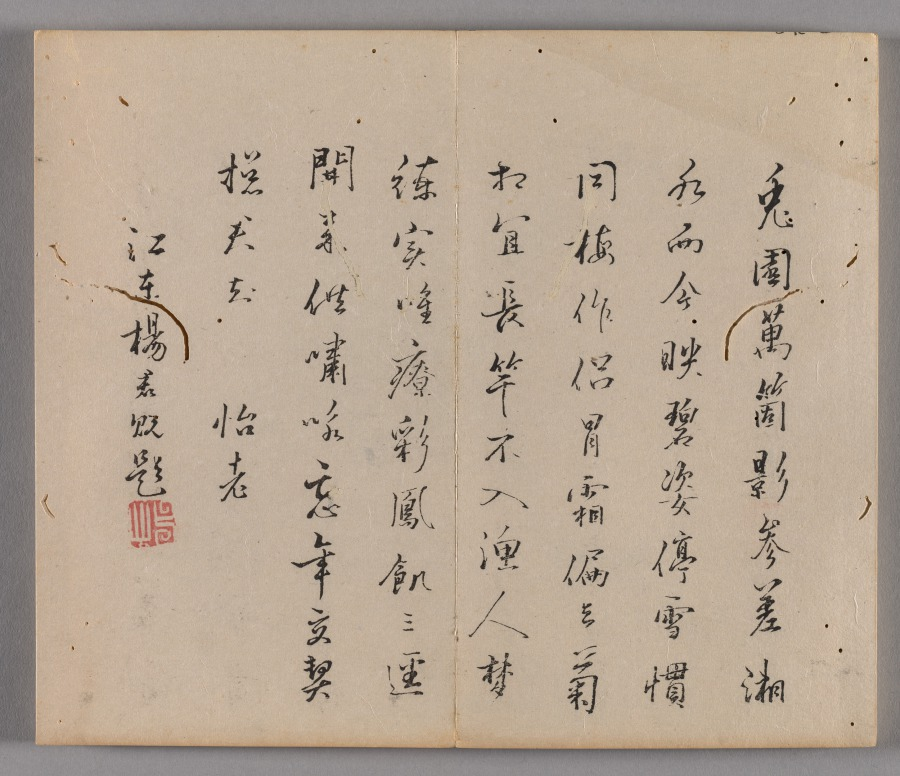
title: Ten Bamboo Studio Painting and Calligraphy Handbook (Shizhuzhai shuhua pu): Bamboo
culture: China, Qing dynasty (1644-1911)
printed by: Hu Zhengyan (Chinese, c. 1584–1674)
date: 1633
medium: Woodblock-printed book; ink and colors on paper; first edition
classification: Print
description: Color printing reached a level of perfection in the early 1600s, as seen in this Ten Bamboo Studio Collection of Calligraphy and Painting and the Mustard Seed Garden Manual of Painting (printed 1679 and 1701). The painterly quality, precision in registering (aligning) the woodblocks, and harmonious colors made them the most successful color print editions in Chinese history. Both editions were printed and compiled in Nanjing, spread nationwide, and had a great impact on the arts in Japan and Korea.